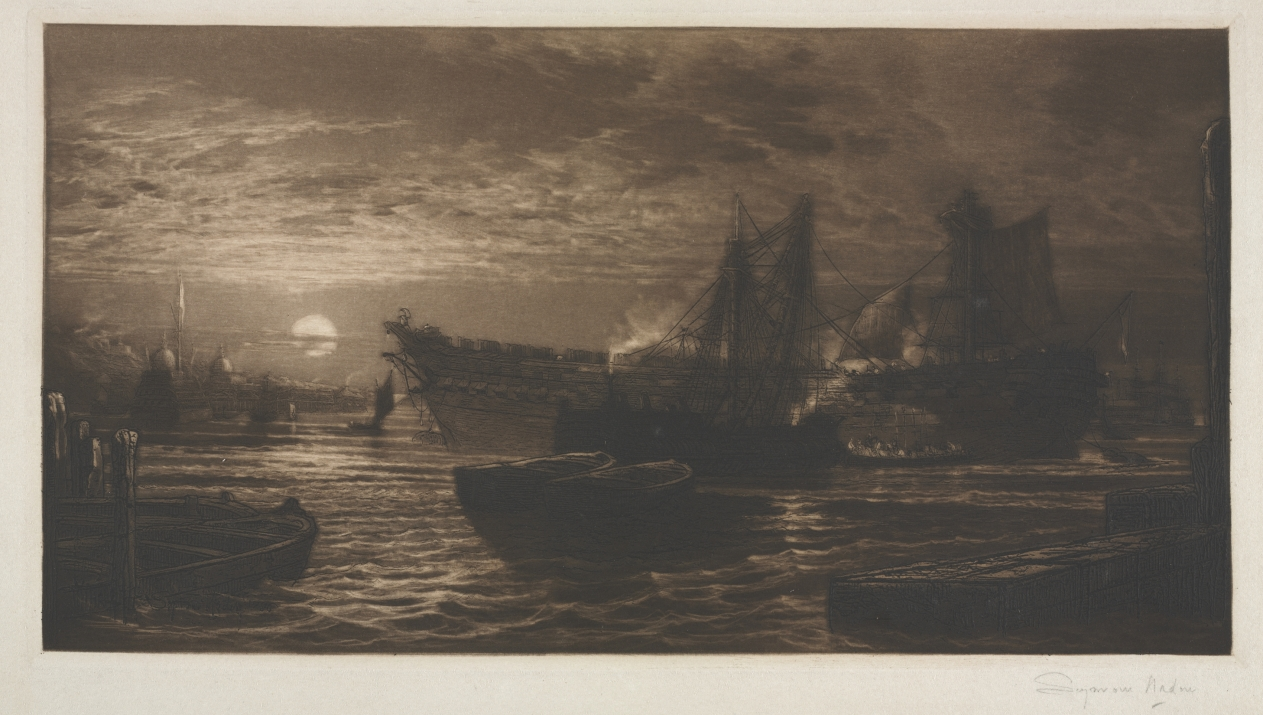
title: Breaking Up of the Agamemon, No. 11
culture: England, 19th century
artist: Francis Seymour Haden (British, 1818–1910)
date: 1880 and later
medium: etching and mezzotint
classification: Print